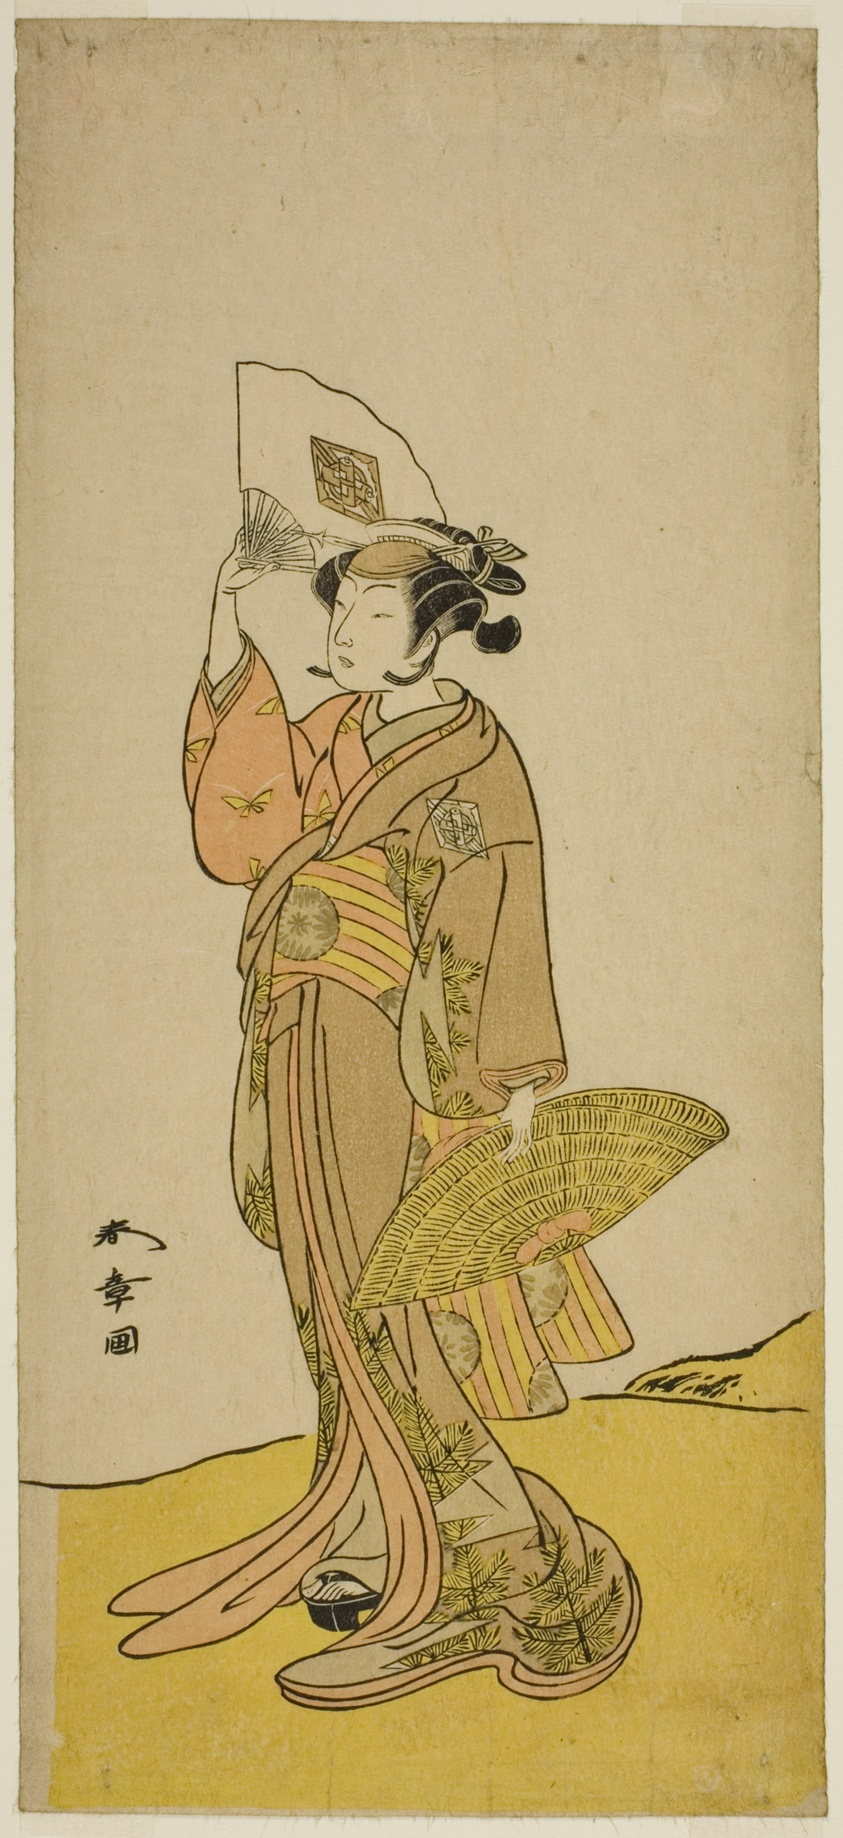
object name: Print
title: The Actor Nakamura Matsue I as Kasaya Sankatsu (?) in the Play Hana no Gosho Konegen Butai (?), Performed at the Nakamura Theater (?) in the Eighth Month, 1772 (?)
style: Japanese (culture or style)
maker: Katsukawa Shunsho 勝川 春章; Japanese, 1726-1792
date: c. 1772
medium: Color woodblock print; hosoban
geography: Japan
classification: woodblock print; print; asian art